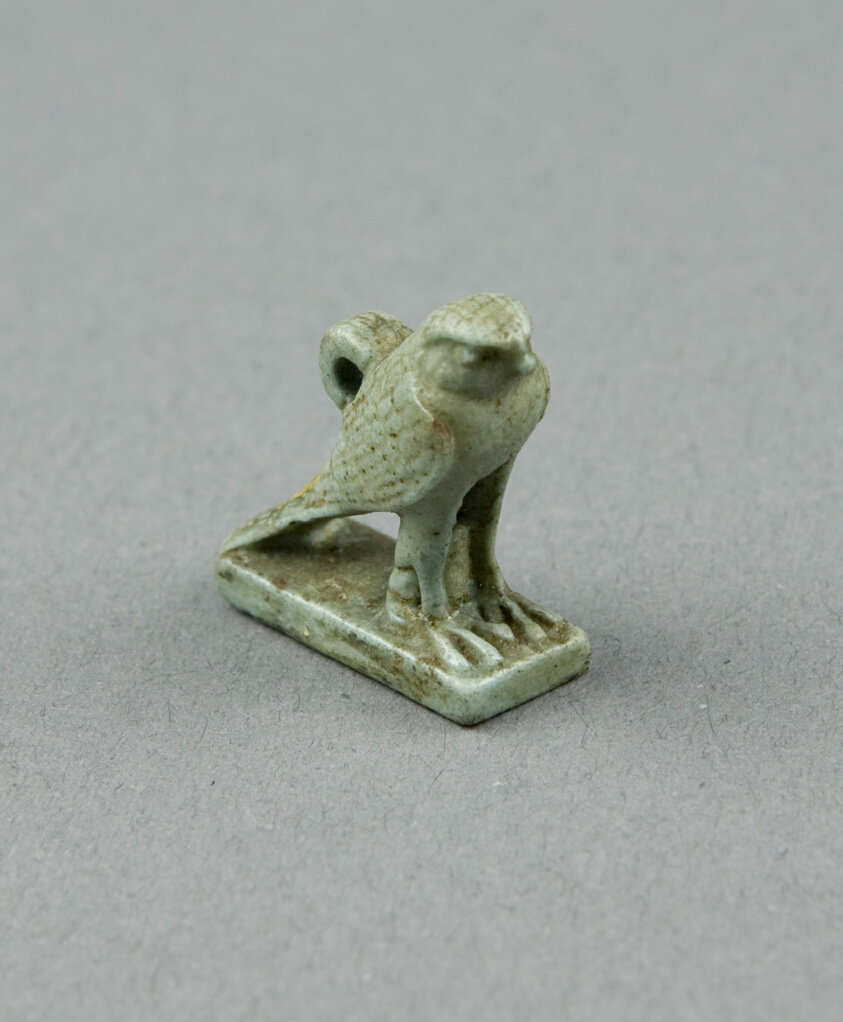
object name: Costume and Accessories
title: Amulet of a Hawk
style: third intermediate period, egyptian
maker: Egyptian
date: Third Intermediate Period, Dynasty 21–25 (1070–656 BCE)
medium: Faience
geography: Egypt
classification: amulet; jewelry; ceramics; ancient art; costume; faïence (composite material)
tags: falcons, birds, gods (deities)